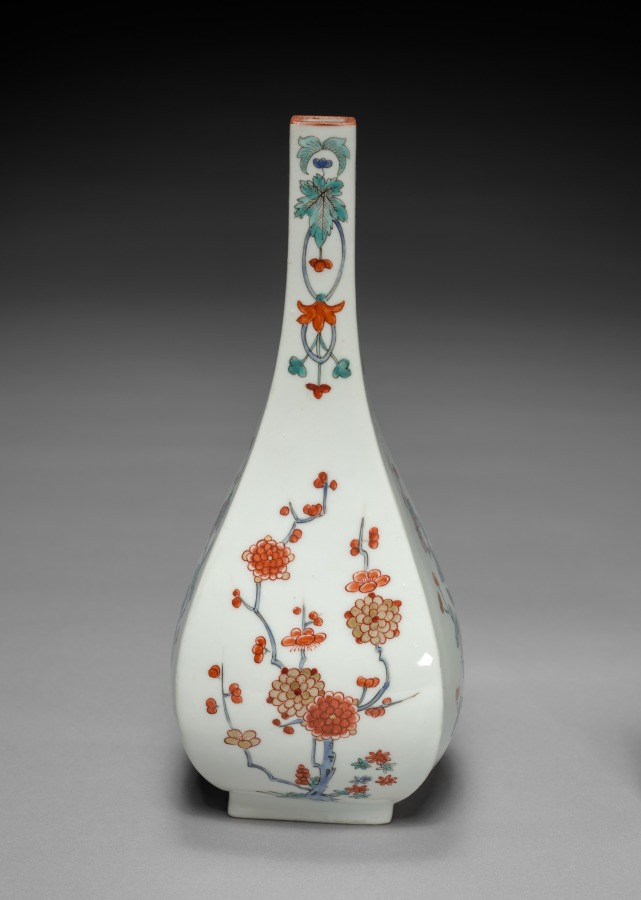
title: Bottle Vase with Plum and Chrysanthemum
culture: Japan, Edo period (1615–1868)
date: late 1600s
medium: porcelain with overglaze color enamel and gold (Hizen ware, Kakiemon type)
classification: Ceramic